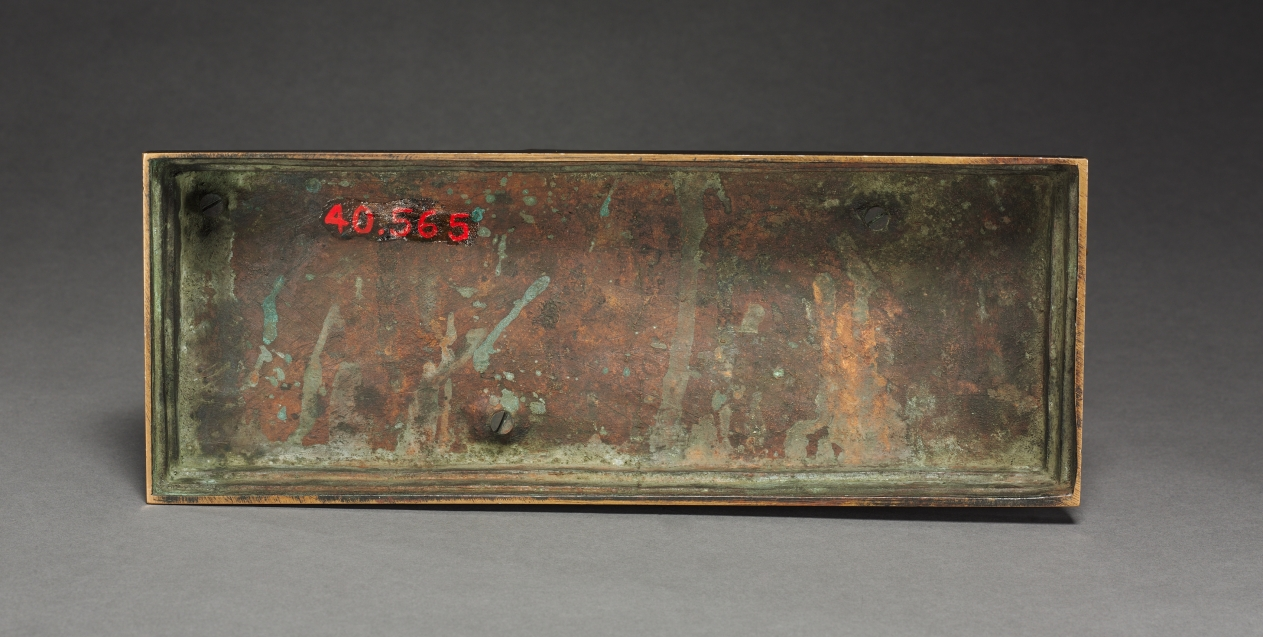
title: Bull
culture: France, 19th century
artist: Antoine-Louis Barye (French, 1796–1875)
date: c. 1841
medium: bronze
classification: Sculpture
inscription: Signed: "Barye"